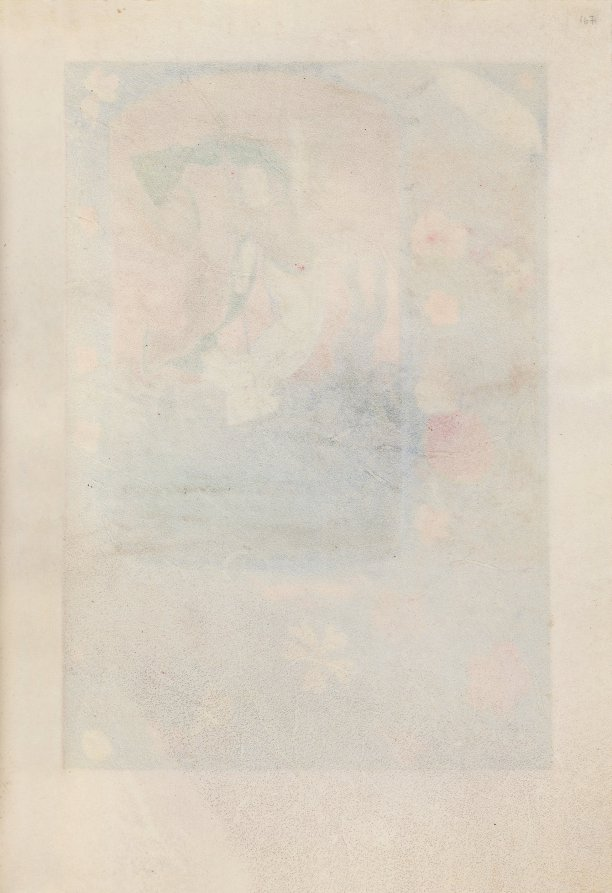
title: Hours of Queen Isabella the Catholic, Queen of Spain: Fol. 167r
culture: Flanders, Ghent and Bruges, late 15th century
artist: Master of the First Prayerbook of Maximillian (Flemish, c. 1444–1519)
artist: and Associates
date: c. 1500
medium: ink, tempera, and gold on vellum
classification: Bound Volume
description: This manuscript was illuminated by a circle of at least five highly organized manuscript painters active in the Flemish cities of Ghent and Bruges. The principal illuminator was Alexander Bening, who painted the majority of the book's miniatures. Manuscripts produced by this circle of artists are renowned for the decoration of their borders, which typically feature a rich variety of realistically-painted flowers, birds, and butterflies. This prayer book, called a book of hours, was intended not for a cleric, but for the private devotions of a lay person-in this case, Isabella the Catholic, Queen of Spain (1451-1504). Isabella's coat of arms embellishes the book's frontispiece. It is unlikely that the book was commissioned by the Queen herself; rather, she probably received it as a diplomatic gift from someone courting her patronage, perhaps Cardinal Francisco Jimenez de Cisneros. A Franciscan friar, Jimenez was dependent upon Isabella for his advancement, first to the post of Queen's confessor in 1492, and then to Archbishop of Toledo in 1495.